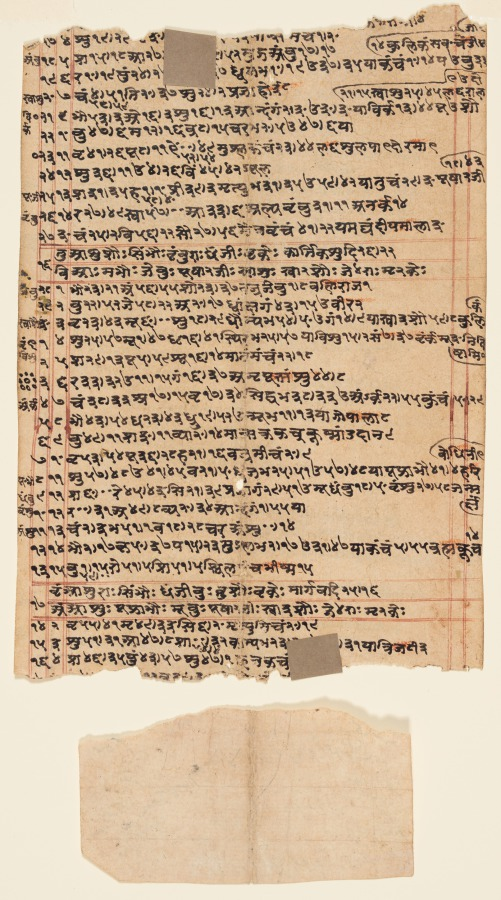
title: Stone sculptures in a Shiva temple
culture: Northern India, Pahari kingdoms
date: c. 1710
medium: gum tempera and ink on paper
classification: Painting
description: Viewers see a temple sanctum, the innermost and holiest part of a temple, from the point of view of the artist standing in front of the doorway. On a pedestal is a stone carving of the Hindu god Shiva on his mount, the bull Nandi. His wife, the goddess Parvati, sits on a lotus above his folded knee. The flowers, textiles, and devotional pigments are traces of ardent religious activity. At the right is an abstract cylindrical sculpture denoting the formless essence of Shiva, known as a linga. The tridents in front of the linga’s pedestal were placed by devotees whose wishes came true after visiting the temple.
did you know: An image of Ganesha can be seen on the left wall of the sanctum sanctorum.